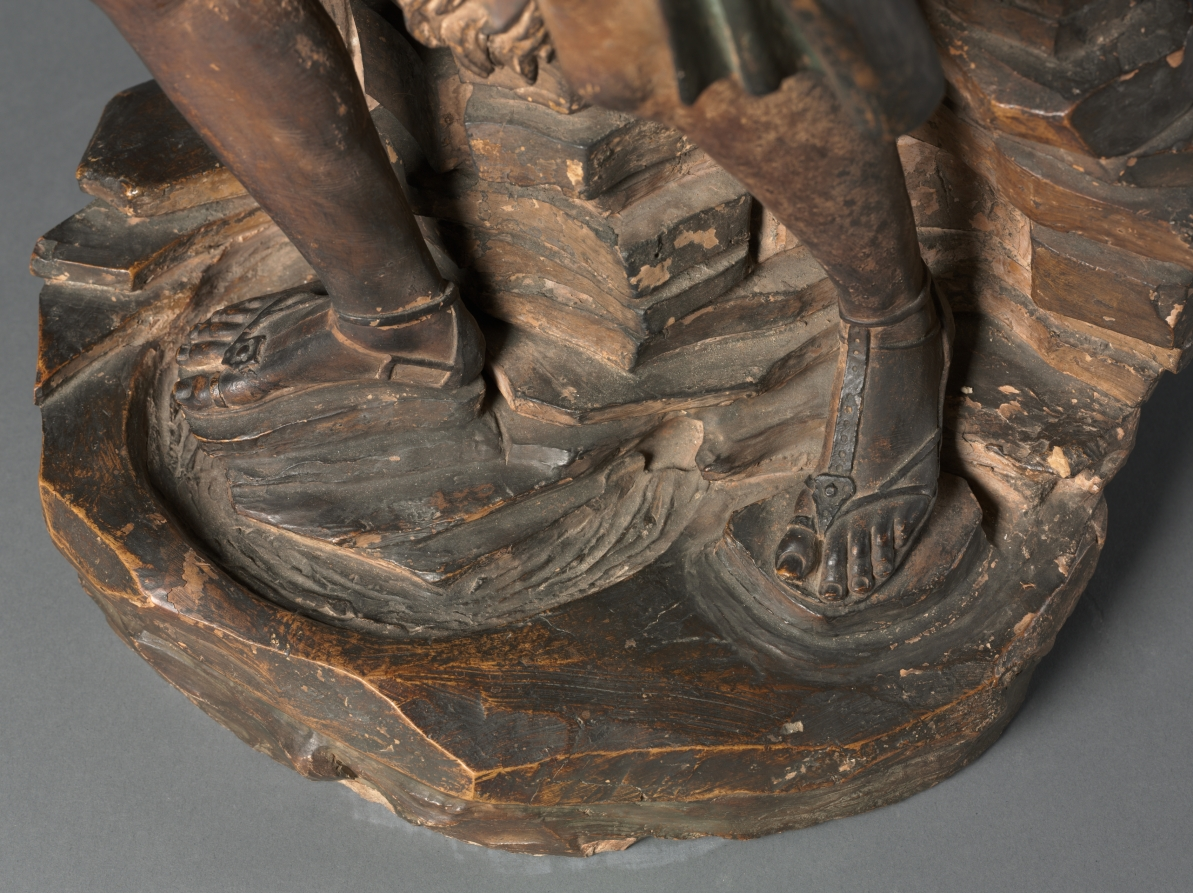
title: Saint John the Baptist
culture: Italy, Florence, 16th century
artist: Master of the Saint John Statuettes (Italian)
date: c. 1500–1525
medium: terracotta with traces of polychromy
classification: Sculpture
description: This statuette belongs to a group of terracotta sculptures representing David (from the OldTestament) and Saint John (from the New Testament) produced by a still unidentified Florentine artist and his studio in the late 1400s and early 1500s. Giventheir scale, it seems likely that these sculptures were intended for use in private homes rather than churches.